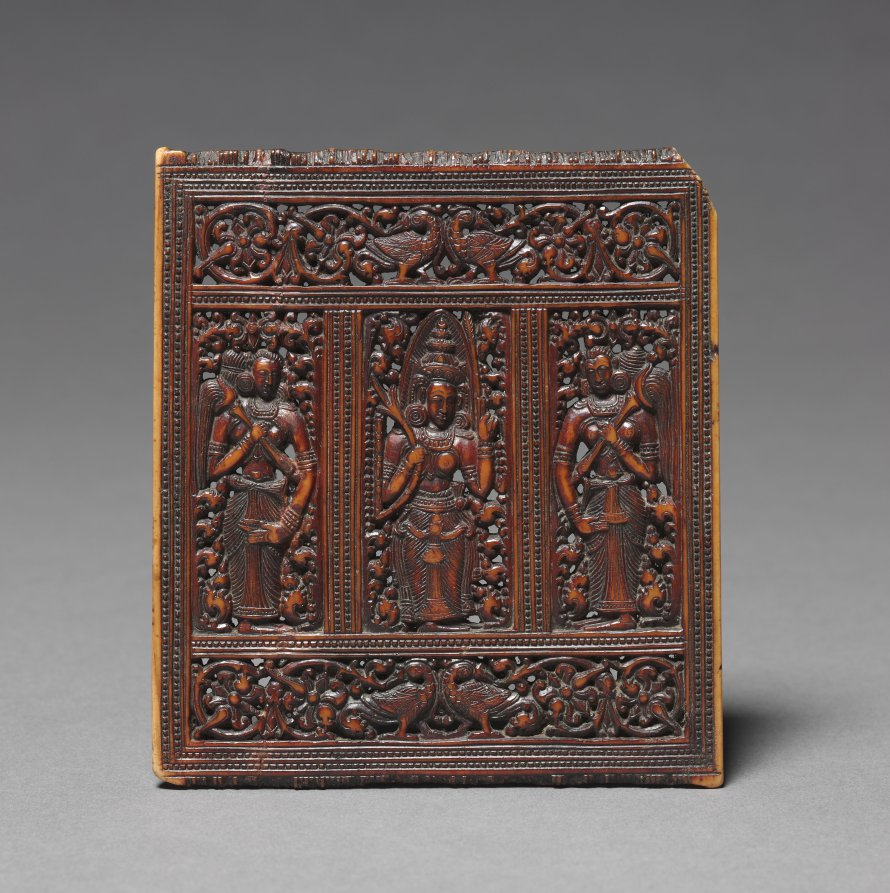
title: Comb with Devi and Attendants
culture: Ceylon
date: 1600s–1700s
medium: ivory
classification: Ivory